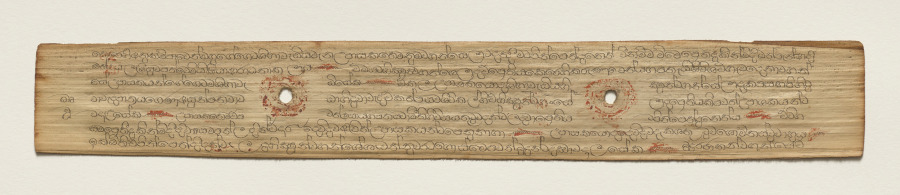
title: Leaf from a Buddhist Manuscript (recto)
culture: Sri Lanka, Singhalese, Late 17th century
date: c. 1700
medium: fiber paper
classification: Manuscript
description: Palm leaf material is still used for manuscripts in Sri Lanka. The palm leaves are prepared first by boiling them, drying them in the sun, and then rubbing them with oils. Scribes then use a metal stylus to incise the text. Then charcoal powder is wiped across the pages, filling in only the inscribed lines.